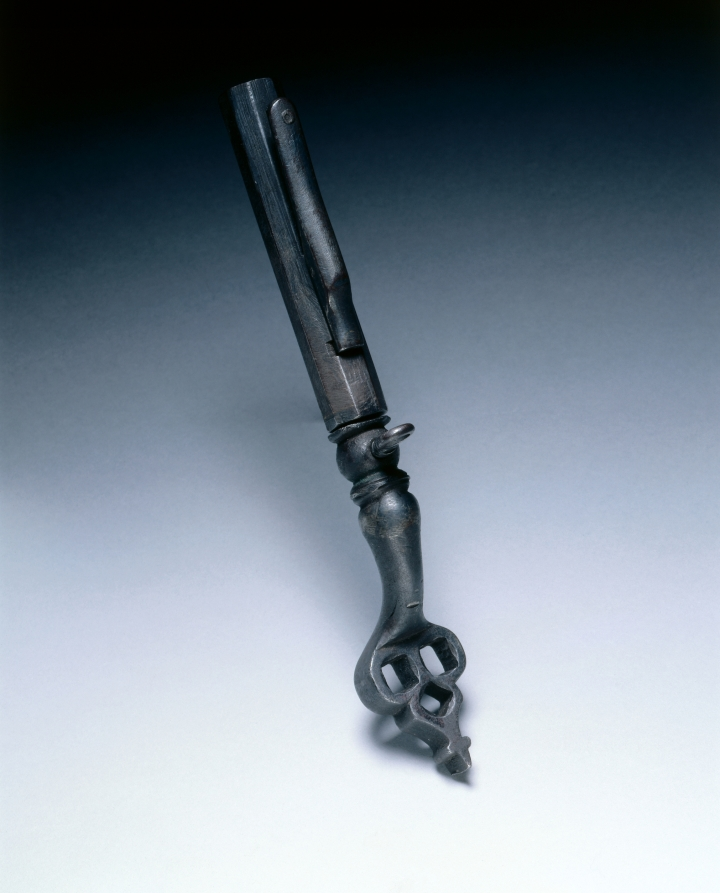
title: Combined Wheel-Lock Spanner and Powder Measure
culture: Germany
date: c. 1625–1650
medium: steel, trefoil top pierced with square holes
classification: Arms and Armor